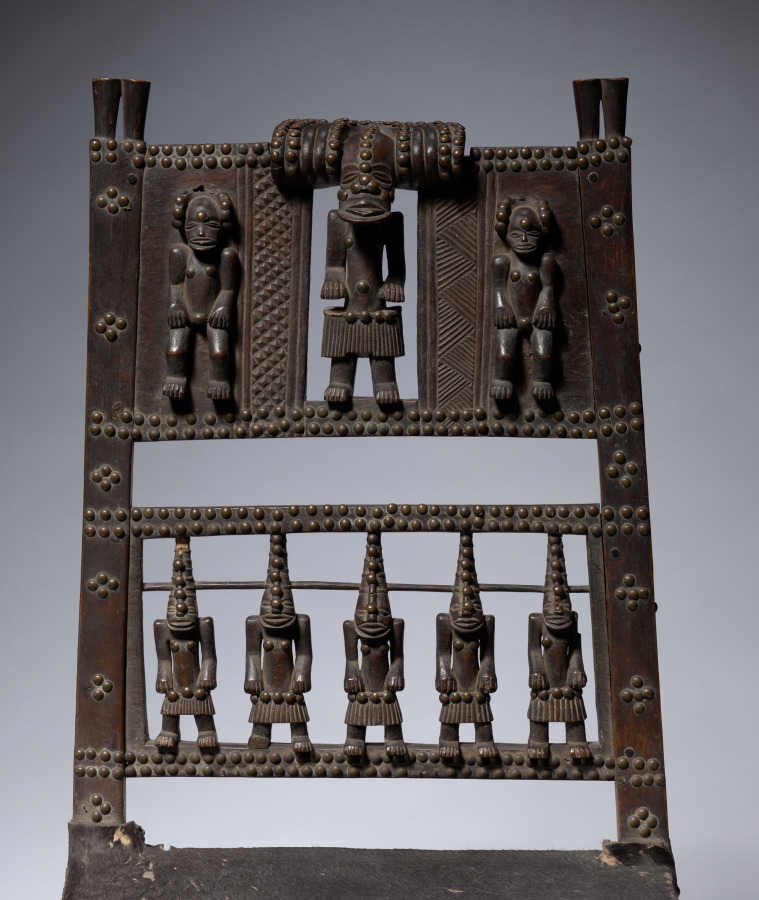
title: Ceremonial Chair or Throne (citwamo ca mangu)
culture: Africa, Central Africa, Angola, Chokwe-style carver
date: 1800s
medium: Wood, upholstery studs, leather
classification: Furniture and woodwork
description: This citwamo ca mangu chair bears over 40 sculpted figures arranged in complex compositions across the chair’s top rail (back), stretchers (rungs), and legs; all symbolize the power of Chokwe supreme chiefs. Such chairs typically bear a dozen or fewer figures. Scenes of royal life and power wrap around the seat, reinforcing how the chief and his family are at the center of their polity and its business.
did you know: Starting around the 1500s, Chokwe and other African leaders and traders received fine chairs as gifts from Portuguese traders. Chokwe leaders adapted this symbol of power as their own, using it in tandem with stools, an earlier kind of prestige seat.